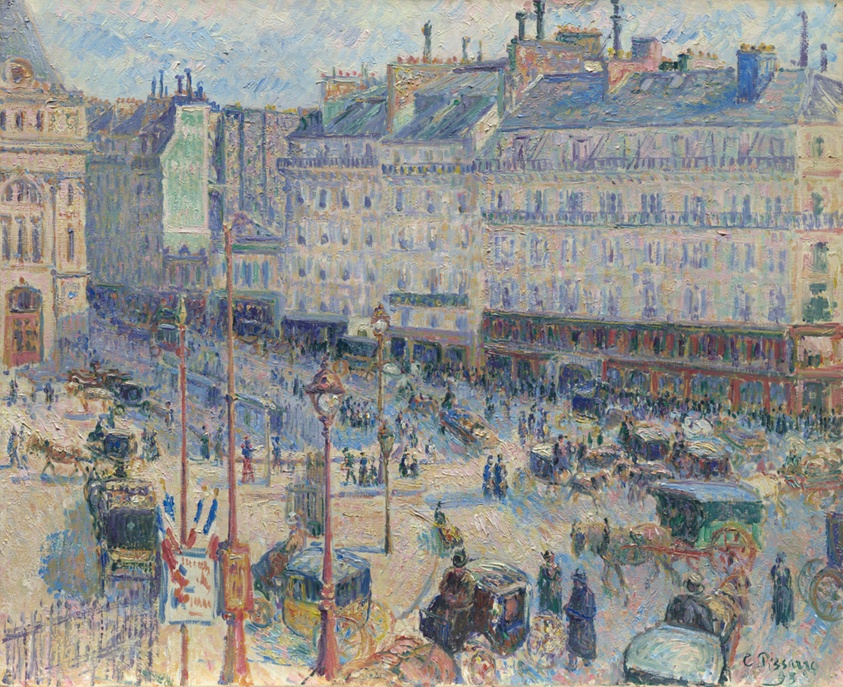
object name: Painting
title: The Place du Havre, Paris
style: Impressionism, nineteenth century, 19th century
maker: Camille Pissarro (French, 1830–1903)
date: 1893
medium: Oil on canvas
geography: France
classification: painting; paint; oil paintings (visual works); oil on canvas; french; european painting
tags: urban life, women, people, Paris, men, lights, horses, horse, France, city scenes, cities, carriage, buildings, building, animals, transportation